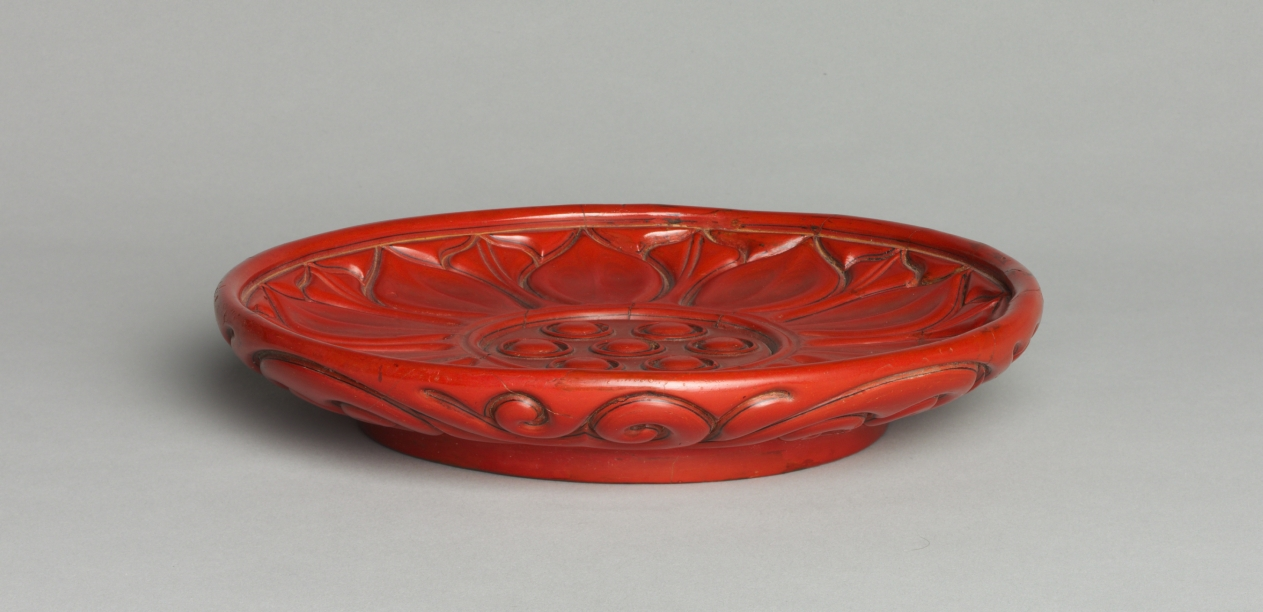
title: Lotus Dish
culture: China, Yuan dynasty (1271-1368)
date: 1271–1368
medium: Carved cinnabar-red lacquer on wood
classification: Lacquer